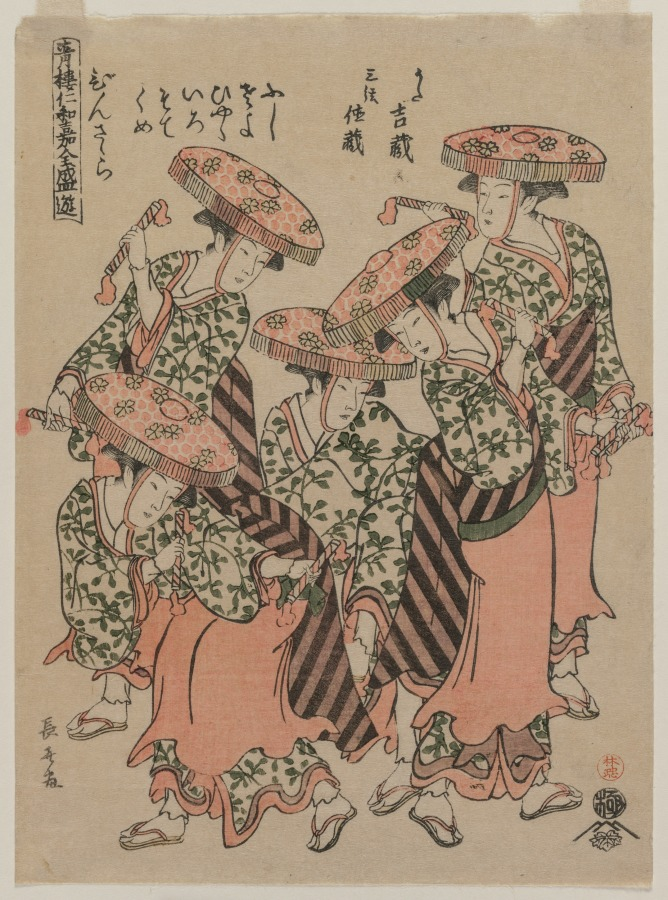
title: Binzasara, A Dance with Clappers (From the series Entertainments at the Height of the Niwaka Festival in the Pleasure Quarters)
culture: Japan, Edo period (1615–1868)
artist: Eishōsai Chōki (Japanese)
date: early 1790s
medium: color woodblock print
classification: Print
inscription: Signature: Choki ga Publisher: Tsutaya Juzaburo (emblem) Seal: kiwame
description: During the eighth lunar month of each year the geisha of the pleasure quarters would form themselves into groups and proceed around the quarter performing dances and skits. It seems likely that woodblock prints featuring the Niwaka Festival were purchased as souvenirs of the occasion. The Binzasara is a ritual dance related to agriculture and fertility performed during the month of May. Agricultural deities are addressed by the use of flowered hats and binzasara clappers.